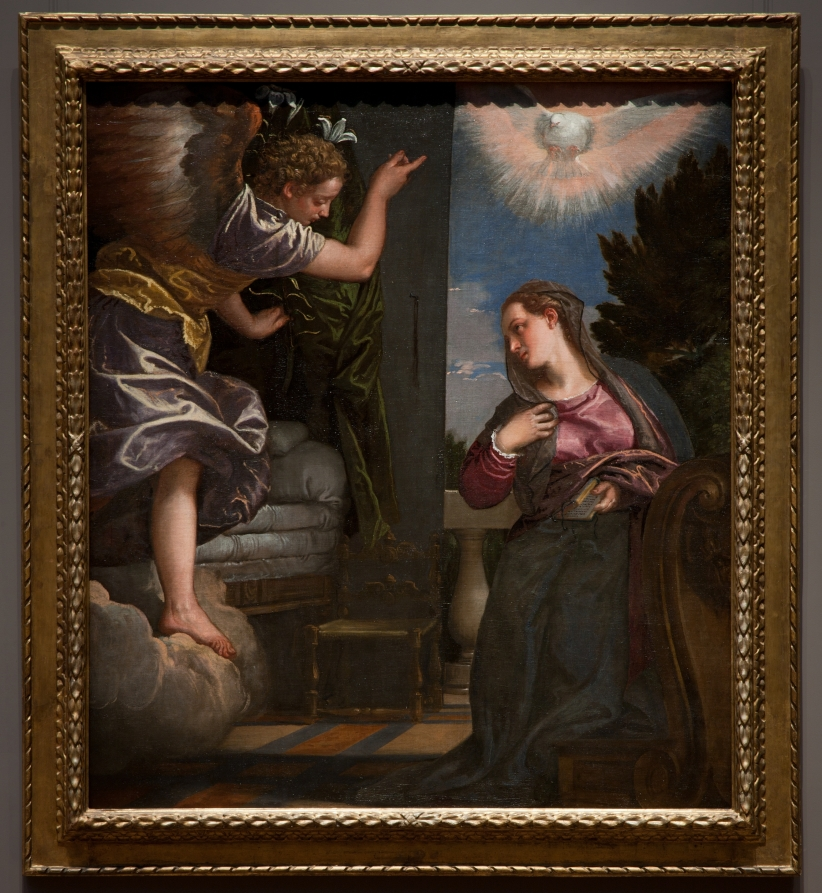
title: The Annunciation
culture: Italy, 16th century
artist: Paolo Veronese (Italian, 1528–1588)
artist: and Workshop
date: c. 1580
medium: oil on canvas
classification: Painting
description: Although Veronese is best known for his large-scale, pageant-like presentations, here the artist has taken the narrative of the Annunciation (the announcement of the angel Gabriel to the Virgin Mary that she would conceive and bear a son) and compressed the figures close to one another, creating a startling intimacy. According to a tradition established by the medieval writer Saint Bernard, Mary has been reading from the Old Testament prophecy of Isaiah (7:14), "A young woman is with child and she will bear a son."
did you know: The white lilies held by Gabriel are a symbol of Mary's purity and innocence, often appearing in depictions of the Annunciation.